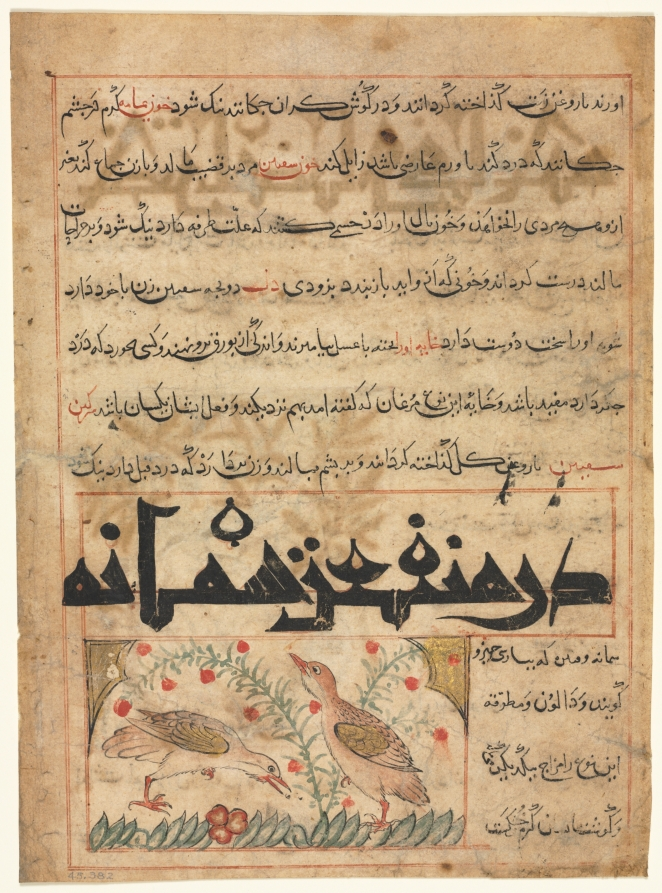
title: Folio from a Persian Manafi‘ al-Hayawan (The Benefits of Animals) of Abu Said Ubaid-Allah ibn Jibrail ibn Bakhtishu (died 1058–68) (verso)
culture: Iran, Maragah, Ilkhanid period (1256–1353)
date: c. 1300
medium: opaque watercolor, ink, and gold on paper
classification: Manuscript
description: The Benefits of Animals describes the physical characteristics of many different animals and provides their medicinal uses at the time. Most of the text on this page is a continuation of a section about doves from the previous page. It says, for example, that blood from dove wings cures sore eyes and cooked dove egg mixed with honey and a little borax is good for those with liver complaints. The large title written in Kufic script near the bottom of the page translates as “The Quail and its Qualities and Benefits,” marking the beginning of the next section. The illustration depicts two quails in active postures. The Mongol ruler of Iran from 1295 to 1304, Ghazan Khan, commissioned a Persian translation of the Arabic text, and this important page is from one of the earliest illustrated manuscripts.